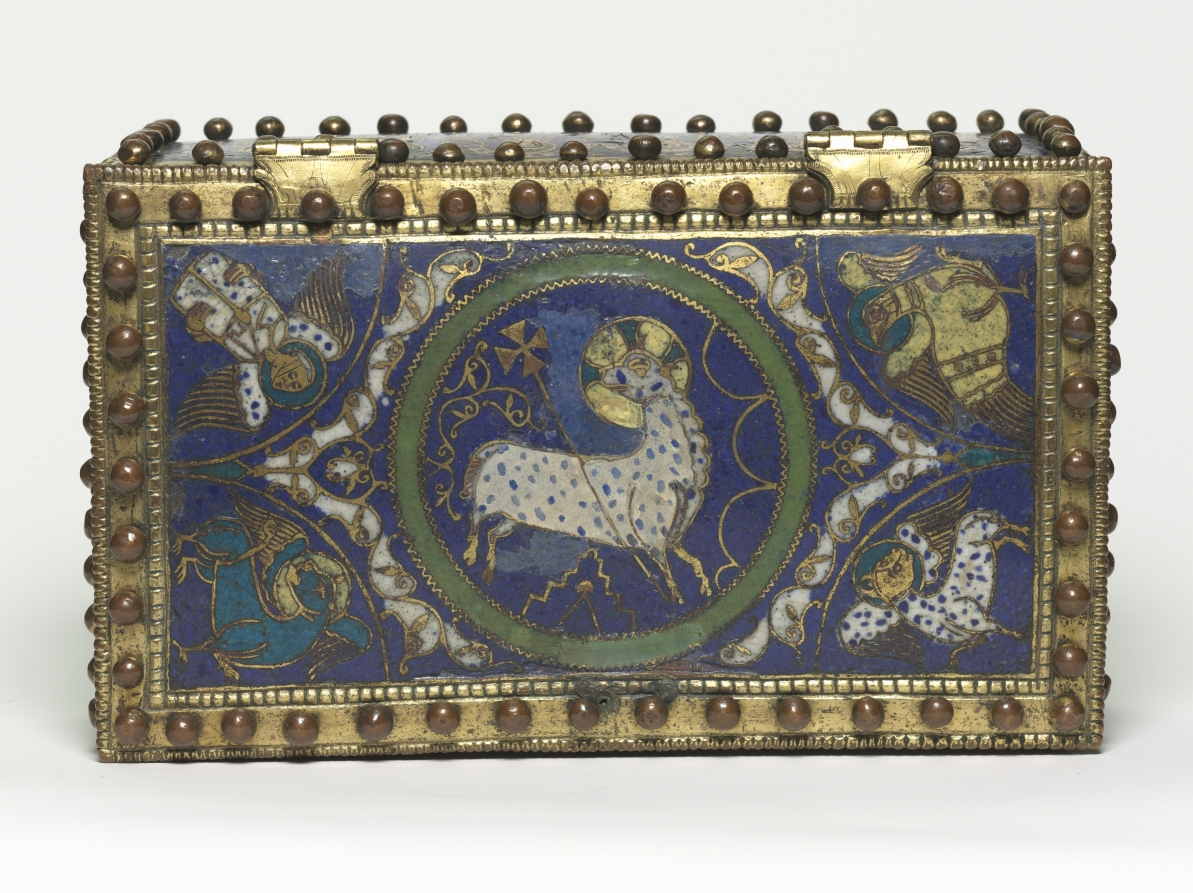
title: Casket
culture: Northern Germany?, Romanesque period, 12th century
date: 1100–1150?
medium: gilded copper, champlevé enamel, wood core (modern)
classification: Enamel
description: This champlevé enamel casket belongs to a distinct group of nine closely related objects characterized by the vivid colors of their enamel decoration and rows of spherical pins placed along the edges of each enamel plaque. Recent X-ray analysis suggests that the casket originally functioned as a stand for an altar cross. Such a function is attested to in at least three related caskets (in Copenhagen, Hildesheim, and Berlin). The casket’s iconographic program features the 12 apostles, placed under arcades (on the long sides), the Crucifixion and Christ in Majesty (on the short sides), and the Lamb of God surrounded by the symbols of the four Evangelists (on the lid).